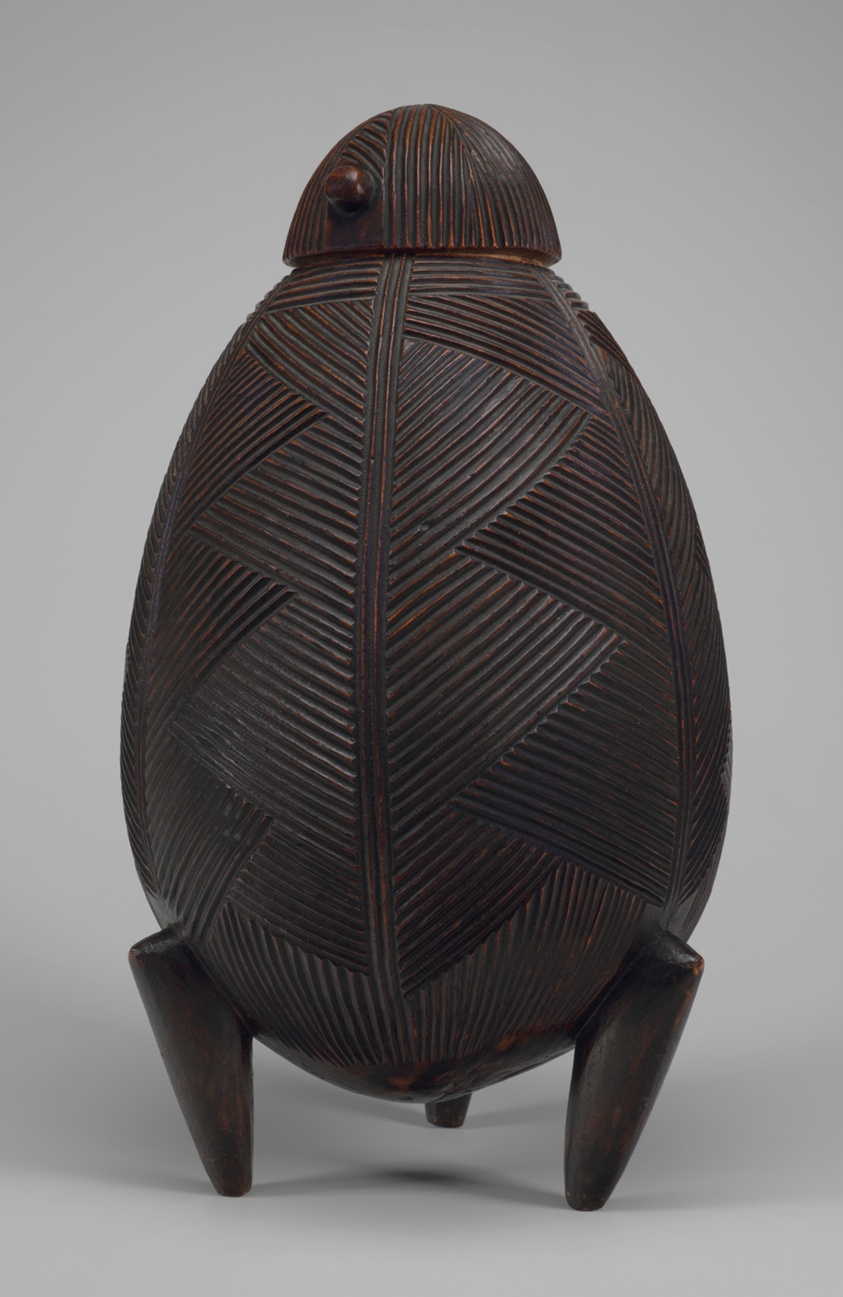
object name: Vessel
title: Lidded Container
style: nguni, Arts of Africa, african Art, south african, Eastern and Southern Africa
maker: Attributed to Unobhadule (active mid- to late 19th century); Northern Nguni; KwaZulu-Natal, South Africa; Eastern and Southern Africa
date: Mid–late 19th century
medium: Wood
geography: South Africa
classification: container; wood; arts of Africa; african art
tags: containers, ceremony, prestige, storage